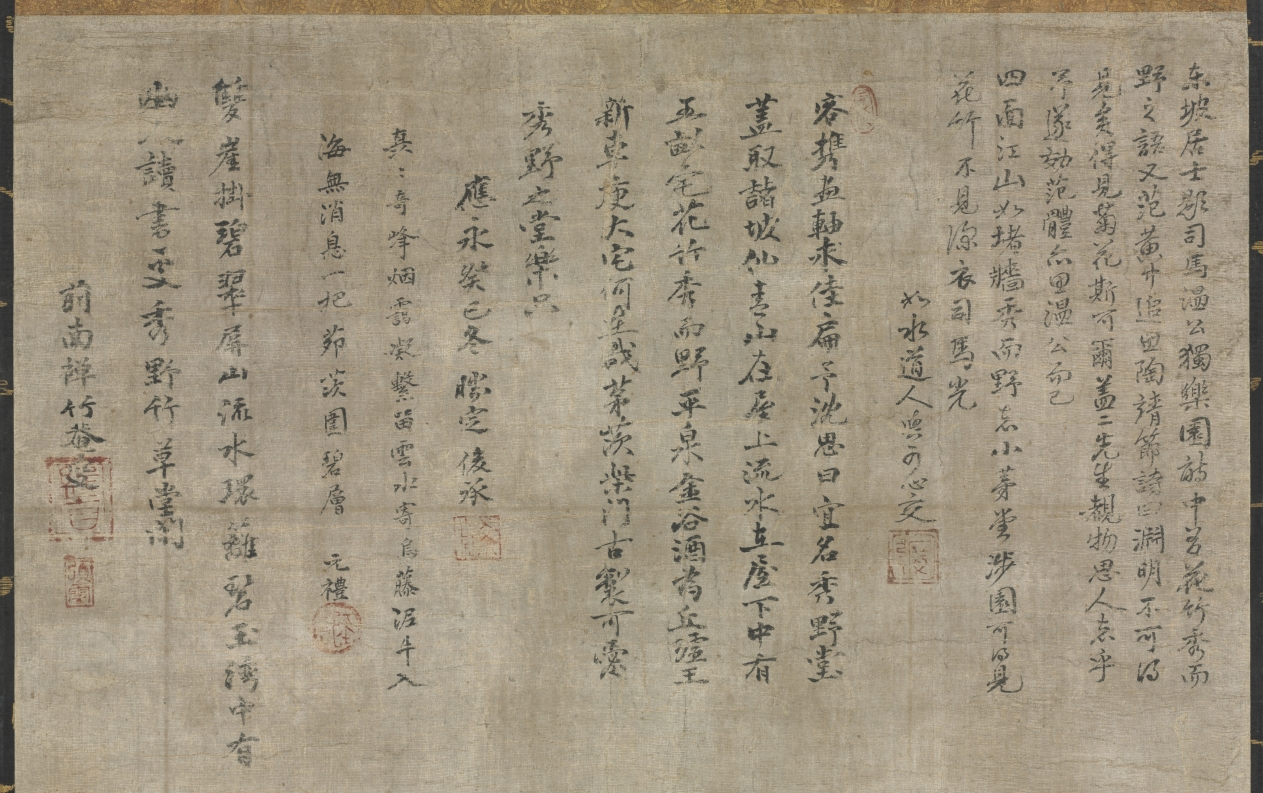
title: Landscape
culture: Japan, Edo period (1615–1868)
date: 1700s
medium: hanging scroll; ink and color on silk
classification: Painting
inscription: four inscriptions (one dated to 1414) by Japanese monks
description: This composition was fashioned after works created by Zen clerics of the Muromachi period (1392–1573), who often added their original Chinese-style poems above an ink painting to make a hanging scroll called a shigajiku. The poems here quote from essays on Sima Guang (1019–1086) by the Chinese Song dynasty literatus Su Shi (1037–1101). They interpret the studio surrounded with bamboo as a metaphor for the garden of Sima, the Song dynasty scholar-official who, in imitation of the Tang poet Bai Juyi, enjoyed the garden in isolation during his exile in Luoyang.